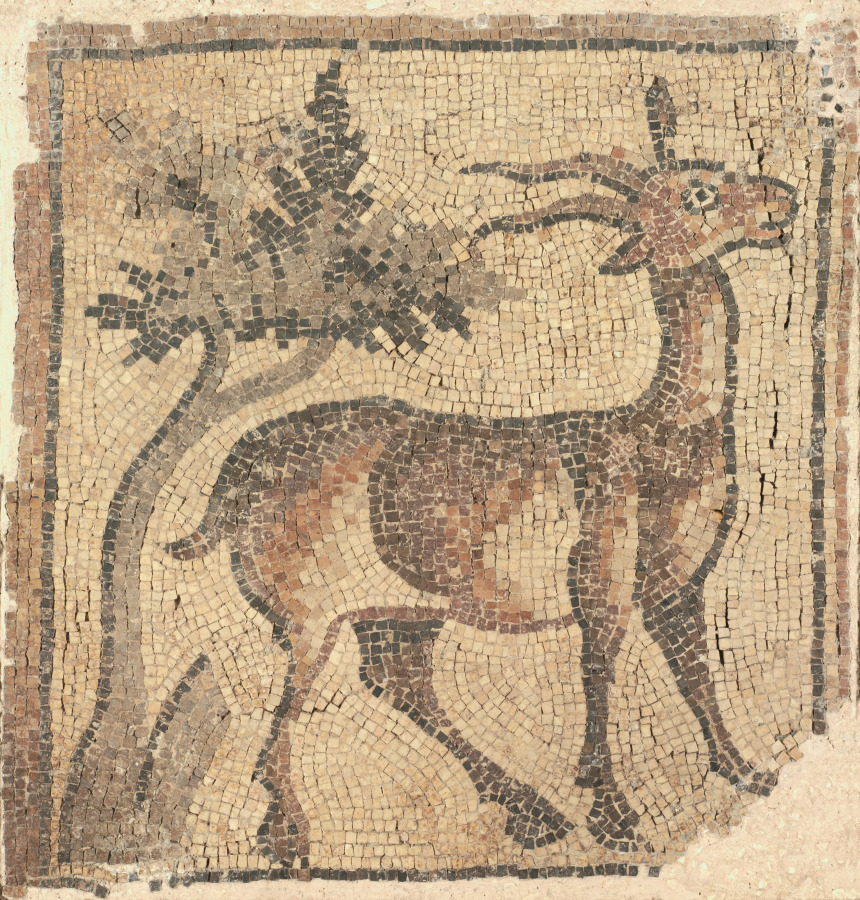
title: Fragment of a Floor Mosaic: Ibex near a Tree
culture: Byzantium, Northern Syria, Byzantine period, 5th century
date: 400s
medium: marble tesserae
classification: Mosaic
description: The two mosaic fragments of an ibex and a ram (1969.113) once formed part of a much larger floor mosaic that decorated an early Byzantine church in northern Syria. Displayed upright in the museum context, these mosaic fragments were originally displayed flat, possibly flanking the church's altar to evoke a paradise setting. The mosaic fragment showing the Fall of Adam and Eve (1969.115) is likely to have formed part of the same floor.